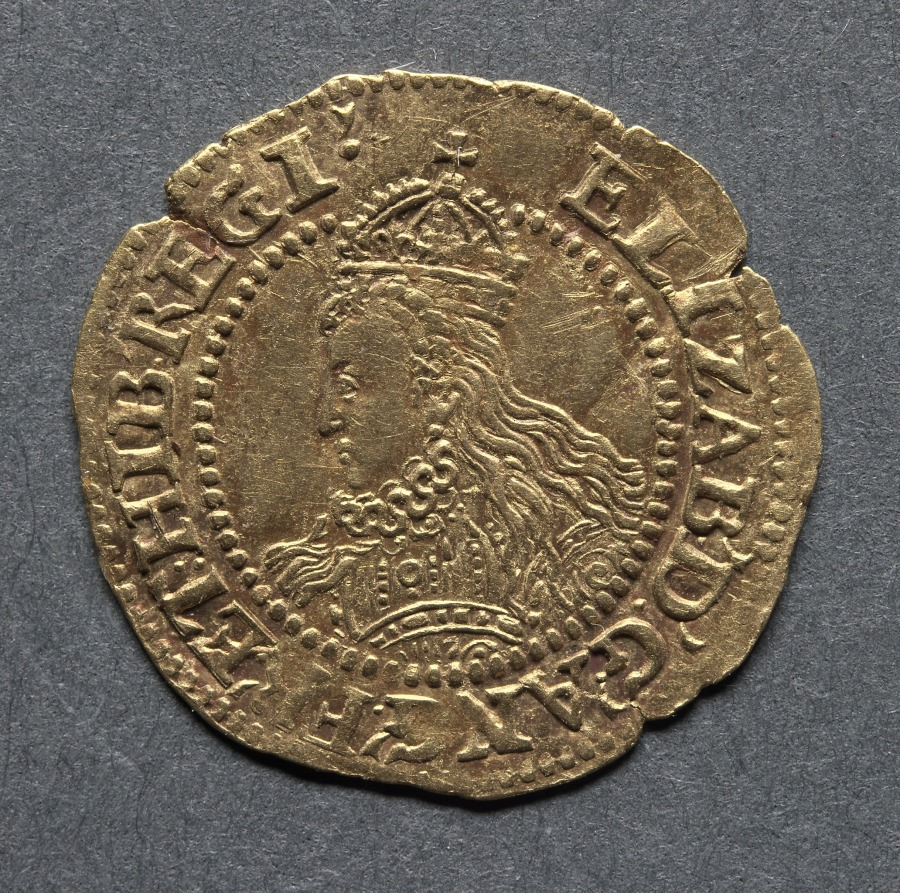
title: Halfcrown: Elizabeth I (obverse); Crowned Shield of Arms (reverse)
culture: England, Elizabeth I, 1558-1603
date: 1592–95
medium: gold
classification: Coins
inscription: ELIZAB; D; G; ANG; FR; ET. HIB; REGI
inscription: SCVTVM. FIDEI. PROTEGET. EAM.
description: This is the second type of gold halfcrown, showing the queen in ornate style. She often wore elaborate and luxuriously decorated dresses, many of them heavily bejeweled as seen here. The mint mark, visible just above the crown on the reverse, is a tun or barrel. This helps identify the date the coin was issued as the mint mark changed every few years.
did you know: First issued in 1549, the halfcrown is the equivalent of two shillings, six pence. It was discontinued in 1970.